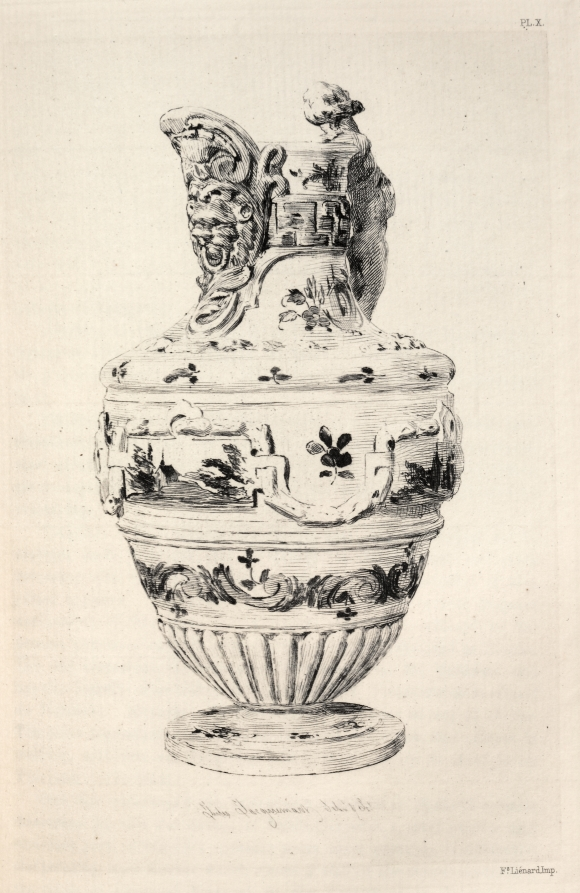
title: History of the Ceramic Art: A Descriptive and Philosophical Study of the Pottery of All Ages and All Nations: Spain: Talavera de la Reyna- Faience- Ewer (Plate X)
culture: France, 19th century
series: Book by Albert Jacquemart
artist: Jules Jacquemart (French, 1837–1880)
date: 1877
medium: etching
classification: Bound Volume